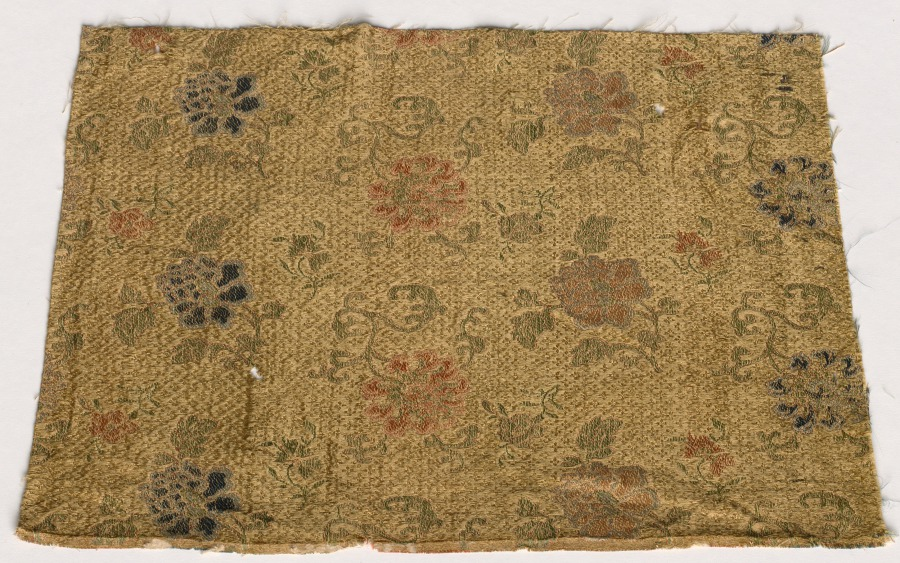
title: Silk Damask Fragment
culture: China, Qing dynasty (1644-1911)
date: 1800s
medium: silk, damask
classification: Textile